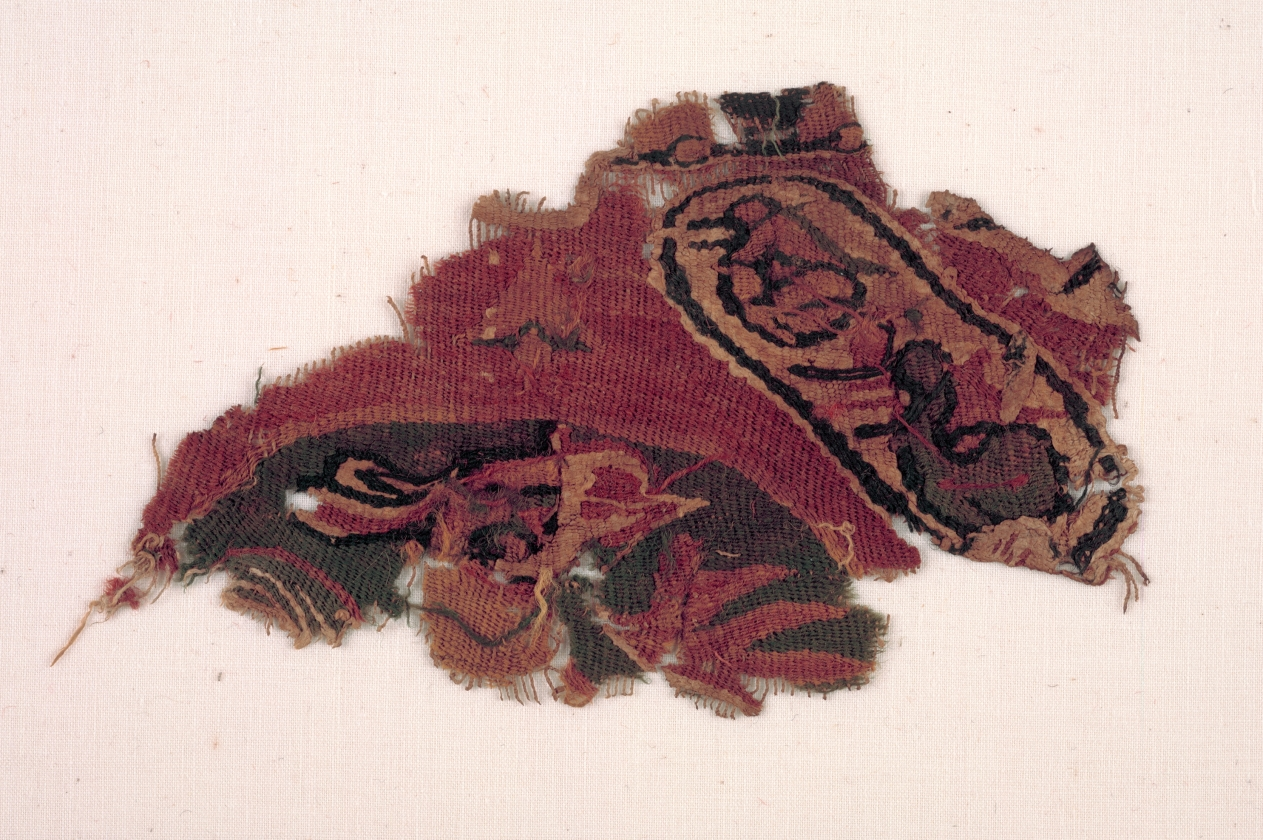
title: Fragment of a Roundel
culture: Egypt, 7th - 9th century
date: 600s - 800s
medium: tapestry; linen and wool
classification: Textile